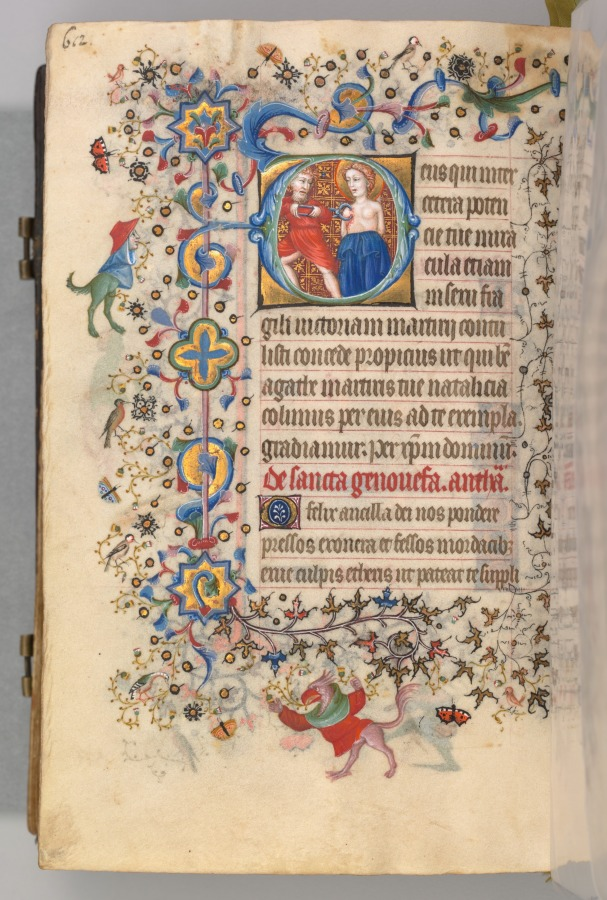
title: Hours of Charles the Noble, King of Navarre (1361-1425): fol. 300v, St. Agatha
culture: France, Paris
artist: Master of the Brussels Initials and Associates (French)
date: c. 1405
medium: ink, tempera, and gold on vellum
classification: Bound Volume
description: This precious volume was obviously highly prized by its owner, the French-born King of Navarre, who had his coat of arms painted on no less than twenty folios. Rather than directly commissioning this manuscript from a specific workshop, it seems that Charles the Noble acquired his book of hours -- perhaps ready-made for the luxury market -- while on a trip to Paris in 1404-05. A collaborative effort, six painting styles are evidenced within the pages of this codex, those of two Italians, two Frenchmen, and two Netherlanders. The painter who was responsible for the planning and decoration of the book, and who produced seventeen of the large miniatures, was a Bolognese artist known as the Master of the Brussels Initials. His principal assistant, responsible for most of the borders, was a Florentine who signed his name "Zecho" da Firenze on folio 208 verso.